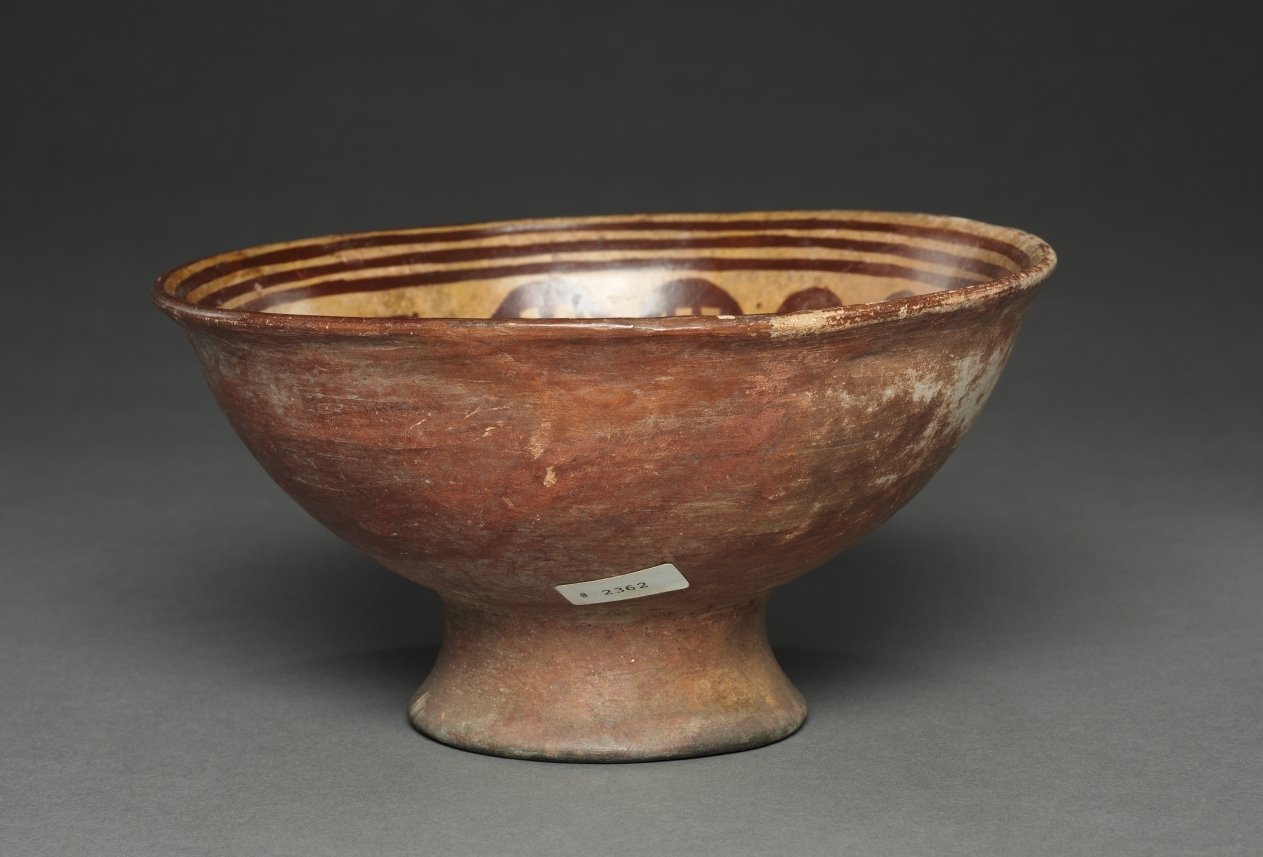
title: Bowl with Procession and Houses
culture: Colombia, Highland Nariño region,Tuza style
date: 1250–1550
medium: ceramic, slip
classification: Ceramic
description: In the Nariño region of southwestern Colombia, the dead were buried in shaft tombs, the most elaborate up to sixty feet deep and furnished with offerings such as these bowls. Colombian ceramics are not much studied and little can be said about their imagery, which reveals a keen interest in geometric abstraction. Depicted here are a row of figures with thatch-roofed huts, humans attacked by birds, and spiders.